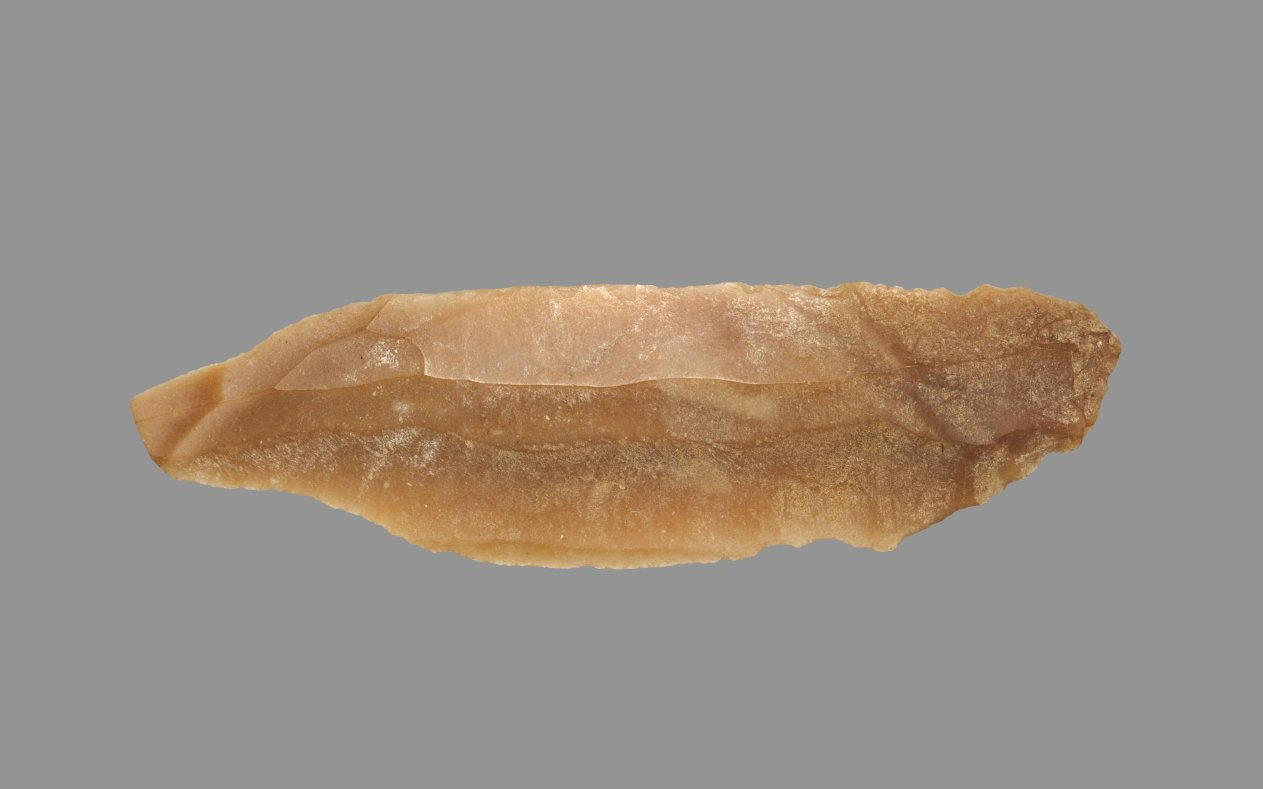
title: Sickle Blade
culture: Egypt, Middle Kingdom (2040–1648 BCE), Dynasty 12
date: 1980–1801 BCE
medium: flint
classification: Implements